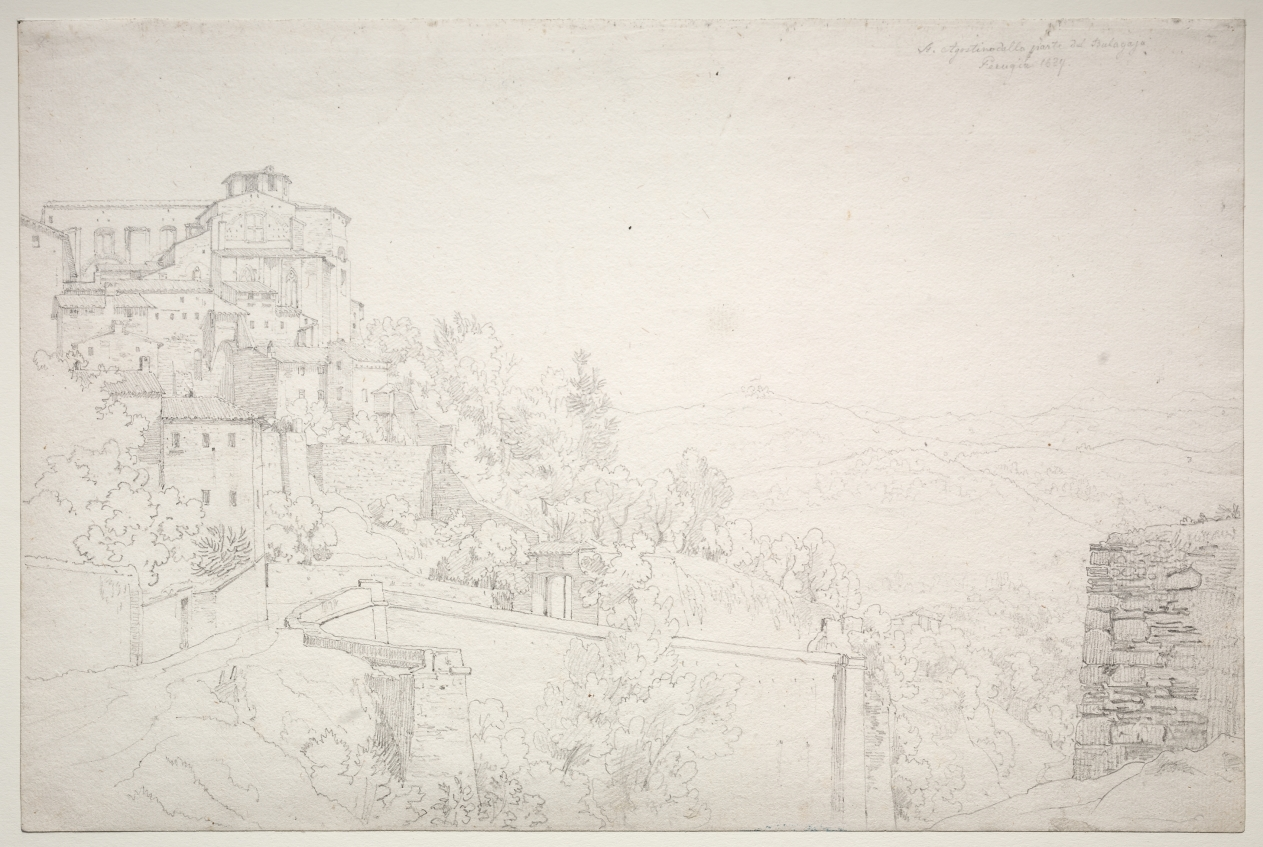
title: Saint Agostino from Bulagajo, Perugia (San Agostino dalla parte del Bulagajo, Perugia)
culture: Austria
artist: Edward Jakob von Steinle (Austrian, 1810–1886)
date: 1829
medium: graphite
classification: Drawing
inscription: [by artist?], upper right, in graphite: St. Agostino dalla parte del Bulagajo / Perugia 1829 ; by artist, center right, in hills: [numerals] ; VERSO, upper center, in graphite: 1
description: An early work by Steinle, this drawing dates from the beginning of the artist’s sojourn in Rome (1828-3). Steinle belonged to the second generation of Nazarenes, a group of young artists who had seceded from Vienna’s academy and committed themselves to the revival of 15th and 16th-century German and Italian art through themes derived from historical and religious sources. Calling themselves the Brotherhood of Saint Luke, they moved to Rome, studied Catholicism, and executed stylized images that recalled the visual sensibility of Renaissance engravings. This view of Saint Agostino and the surrounding landscape is in keeping with the Nazarene’s aesthetic, to which Steinle adhered troughout his career.